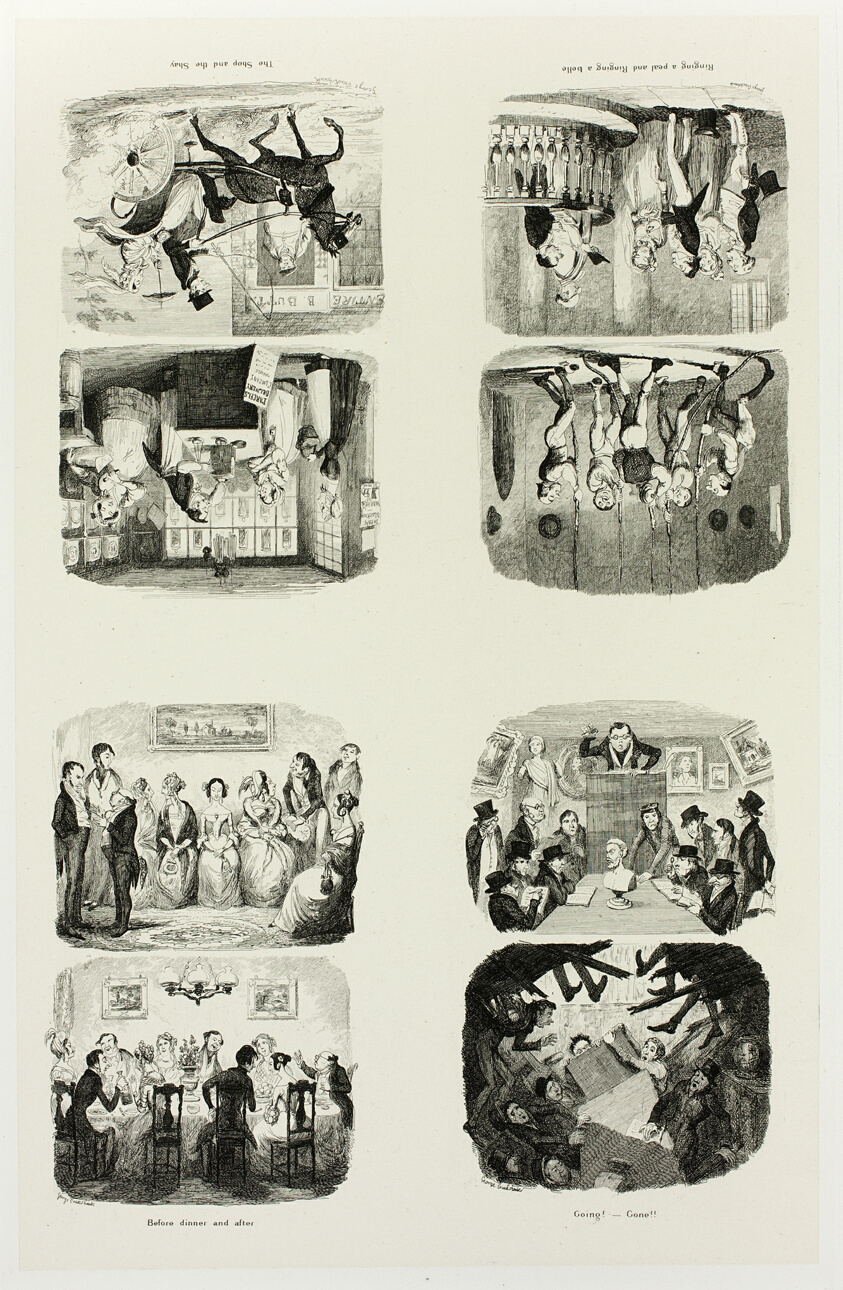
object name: Print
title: The Shop and the Shay from George Cruikshank's Steel Etchings to The Comic Almanacks: 1835-1853 (top left)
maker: George Cruikshank (English, 1792-1878); published by Pickering & Chatto (English, 19th century)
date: 1842, printed c. 1880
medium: Four steel etchings in black on cream India paper, laid down on off-white card (chine collé)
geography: England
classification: etching; paper; print; prints and drawing